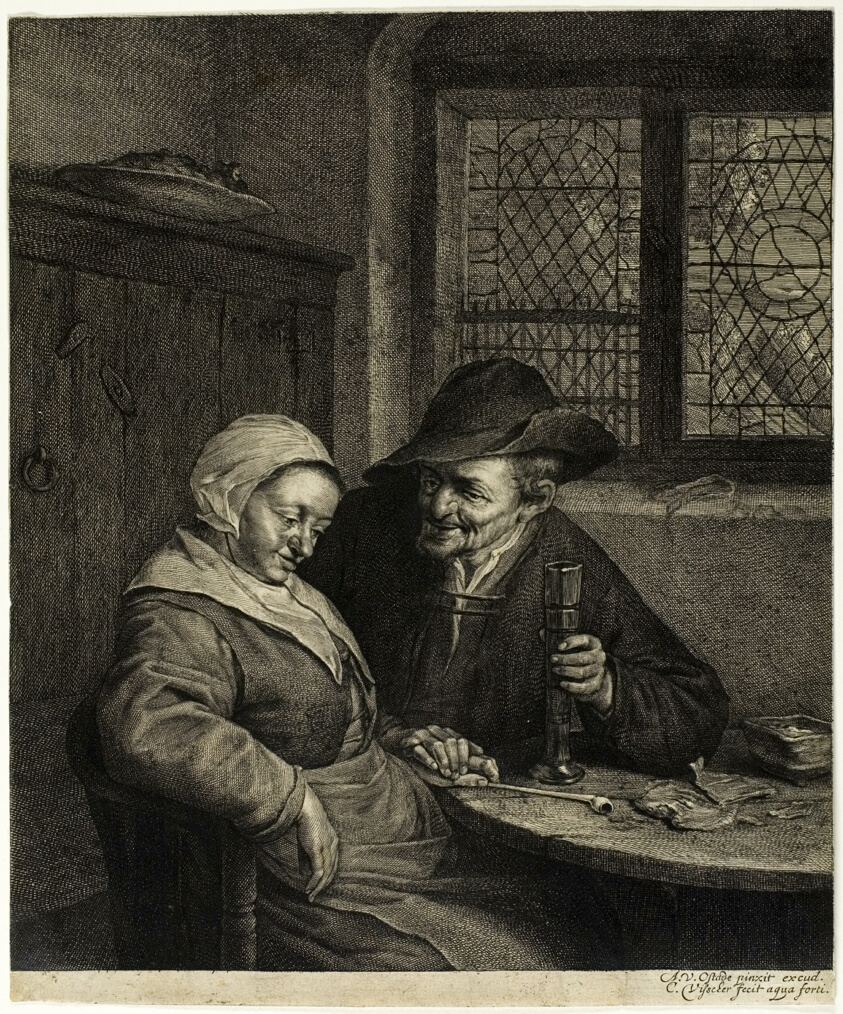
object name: Print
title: The Chat (Het Zoute Scholletje)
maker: Cornelis Visscher (Dutch, c. 1629-1658); after Adriaen van Ostade (Dutch, 1610-1685)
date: c. 1653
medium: Etching and engraving on ivory laid paper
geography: Holland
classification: engraving; print; prints and drawing